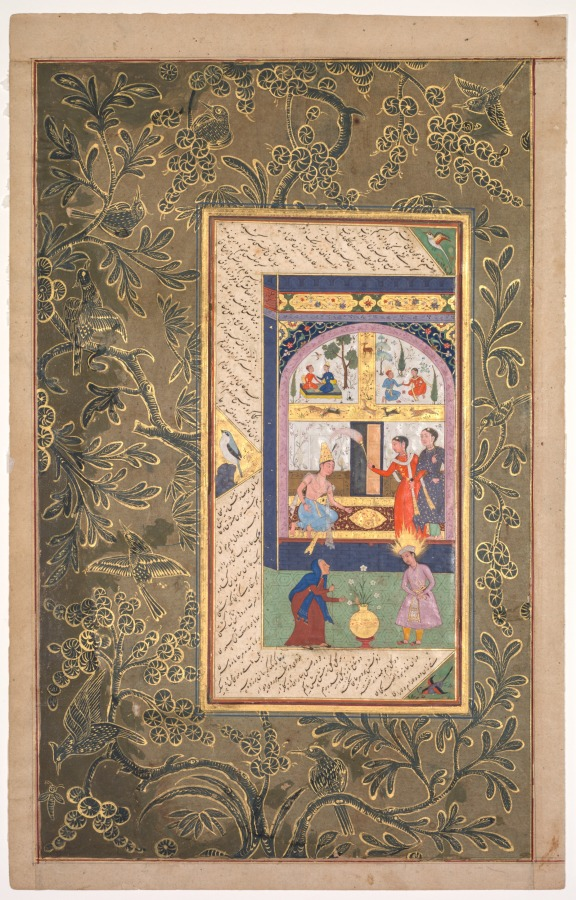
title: Zulaykha in her palace and as an elderly woman with Joseph (recto), from a Panj Ganj (Five Treasures) of Abd al- Rahman Jami (Persian, 1414–1492)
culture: Western Afghanistan, Herat (text); Mughal India (paintings)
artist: Mushfiq (Indian, active early 1600s)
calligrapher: Sultan 'Ali al-Mashadi (Iranian, 1430–1520)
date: 1603–7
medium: Gum tempera, ink, and gold on paper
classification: Painting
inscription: [[Upper left of painting, against a red background, in nasta’liq script]] ' amal - i Mushfiq sana 1015 Text on verso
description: The golden pot of white narcissus flowers at the bottom center of the painting signals that Zulaykha, leaning on her staff to the left, will imminently have her youth and beauty restored. In this Persian retelling of the Old Testament account from the Bible, Zulaykha lusted after Joseph, even though she was already married to Potiphar. Joseph, with the golden halo, resisted her advances until she became a widow and retained his youth, because of his extreme virtue. Above, Zulaykha as a young woman waits for Joseph in her house where murals of them as a happy couple are painted on the walls.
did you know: Zulaykha is shown four times: twice in the murals, seated in the center, and below when she is much older.